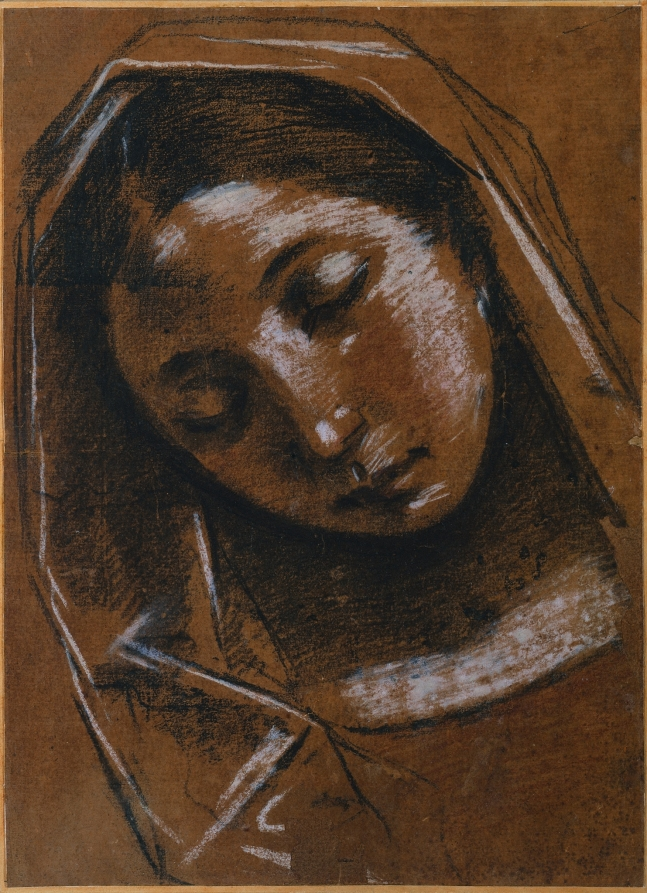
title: Head of the Virgin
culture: Italy, 17th century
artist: Giacomo Cavedone (Italian, 1577–1660)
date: c. 1614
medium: black crayon (rubbed in places) with red chalk, heightened with white crayon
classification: Drawing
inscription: VERSO OF SECONDARY SUPPORT, lower center, in graphite: Giacomo Cavedone